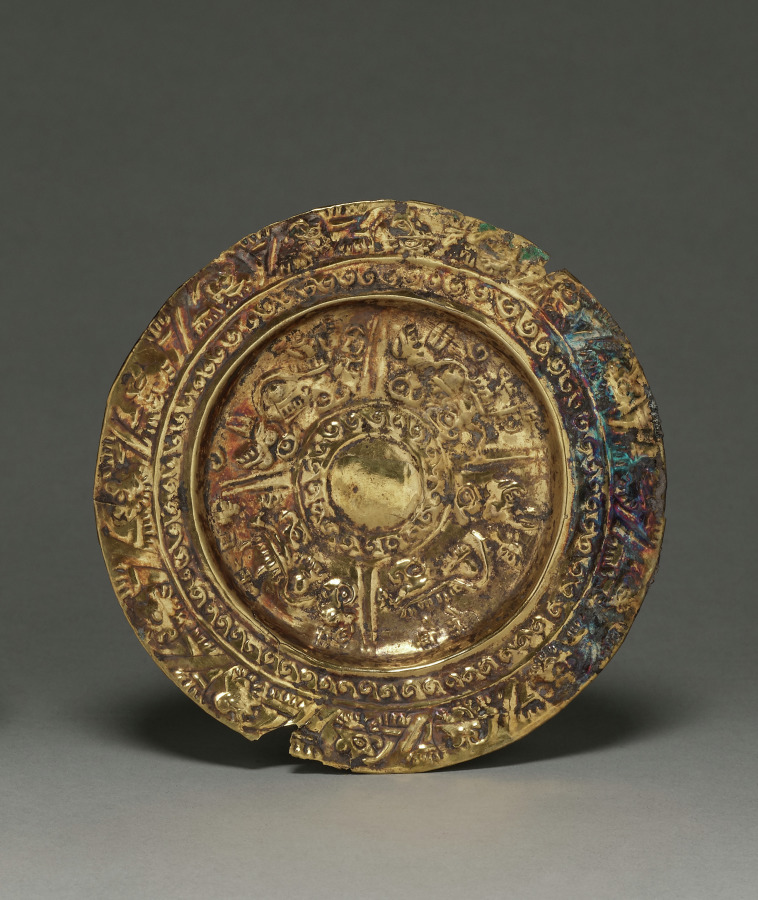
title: Ear Ornament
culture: Peru, North Coast, Sicán, 9th-14th century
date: c. 800–1370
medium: hammered and embossed gold alloy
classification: Metalwork